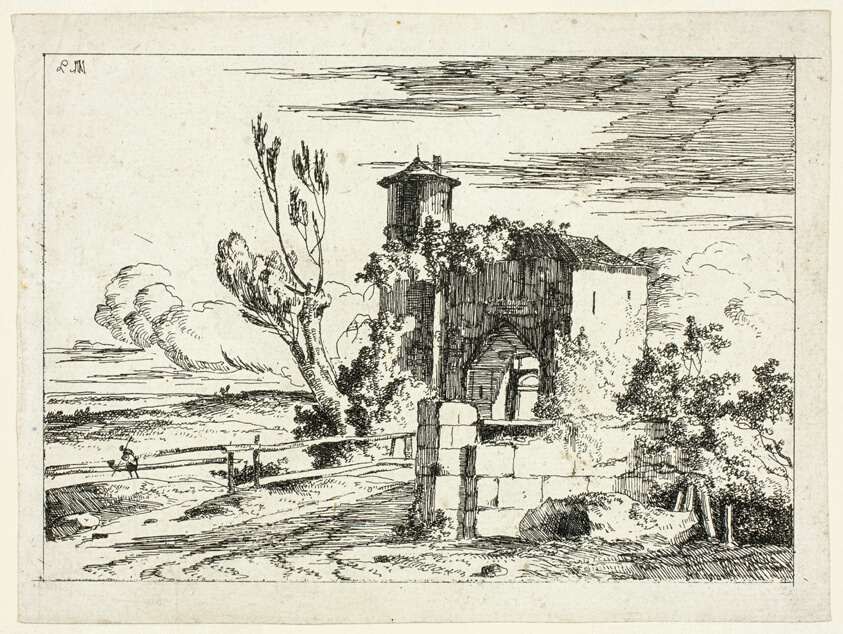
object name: Print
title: Landscape with Old Gateway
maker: Louis Gabriel Moreau (French, 1740-1806)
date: 1779–97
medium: Etching on paper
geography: France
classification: etching; print; prints and drawing